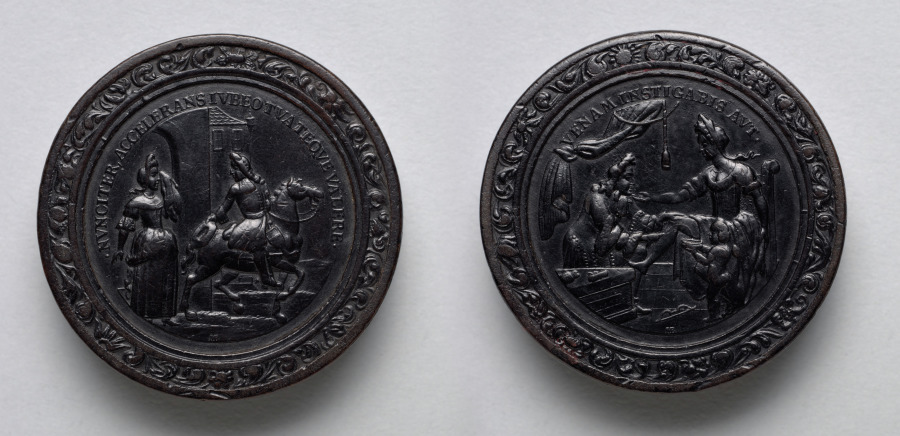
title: Gaming Piece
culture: Germany, late 17th-early 18th Century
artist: Martin Brunner (German, 1659–1725)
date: c.1700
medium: wood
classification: Furniture and woodwork